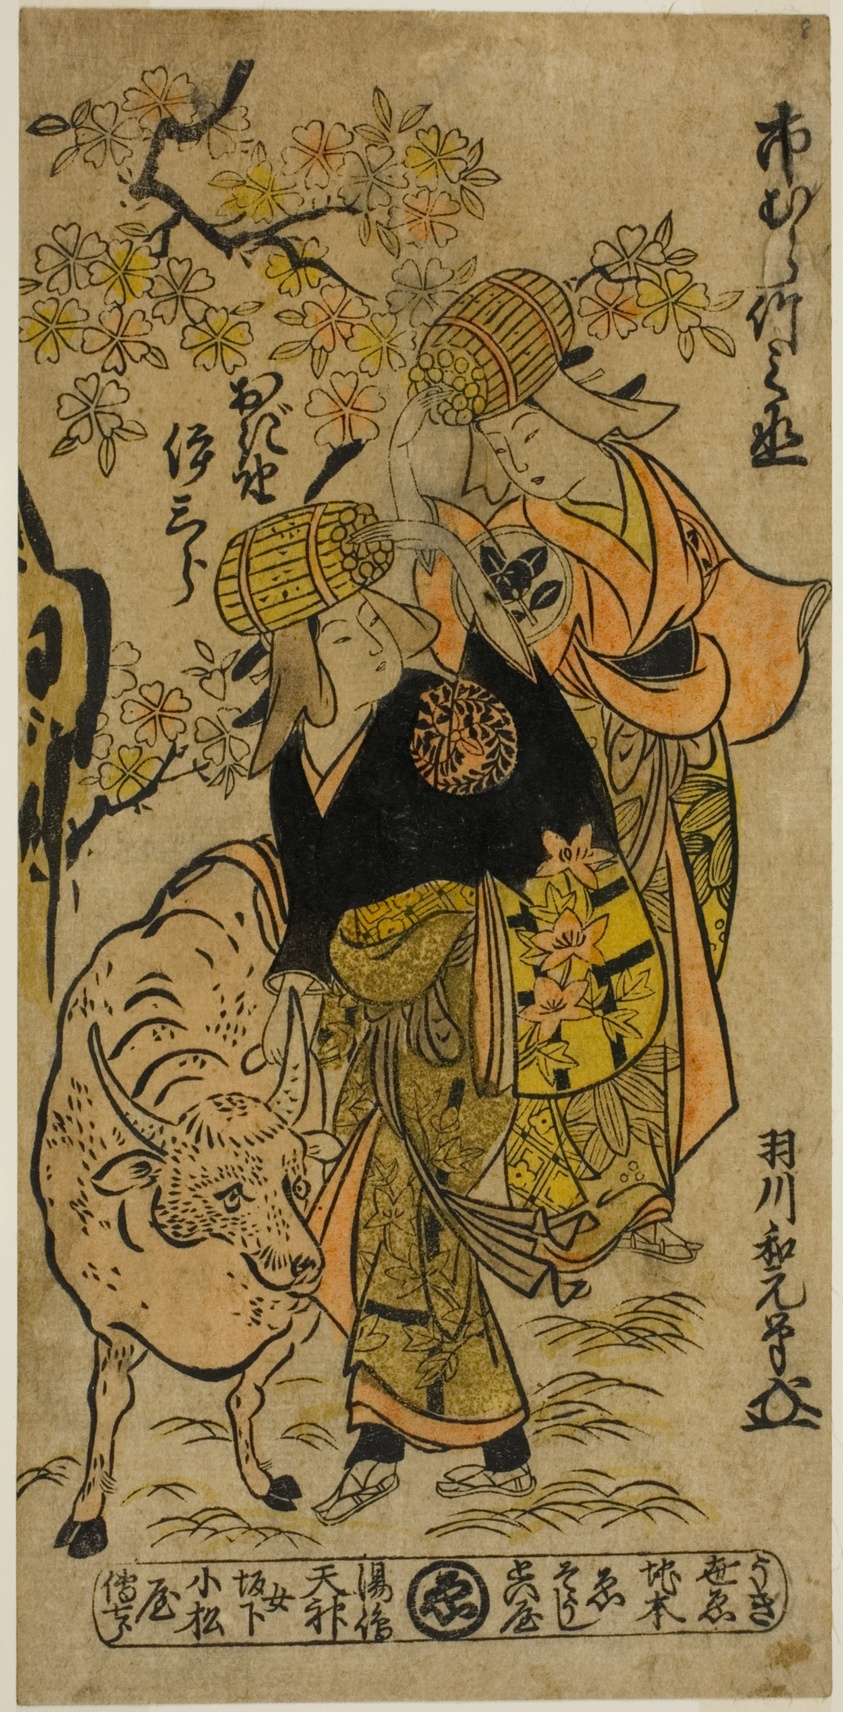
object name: Print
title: The Actors Ichimura Takenojo IV and Ogino Isaburo I as firewood peddlers in the play "Niwatori Oshu Genji," performed at the Ichimura Theater in the first month, 1726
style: Japanese (culture or style)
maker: Hanekawa Wagen (Japanese, active c. 1716-36)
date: 1726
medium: Hand-colored woodblock print; hosoban, urushi-e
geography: Japan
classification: woodblock print; print; asian art